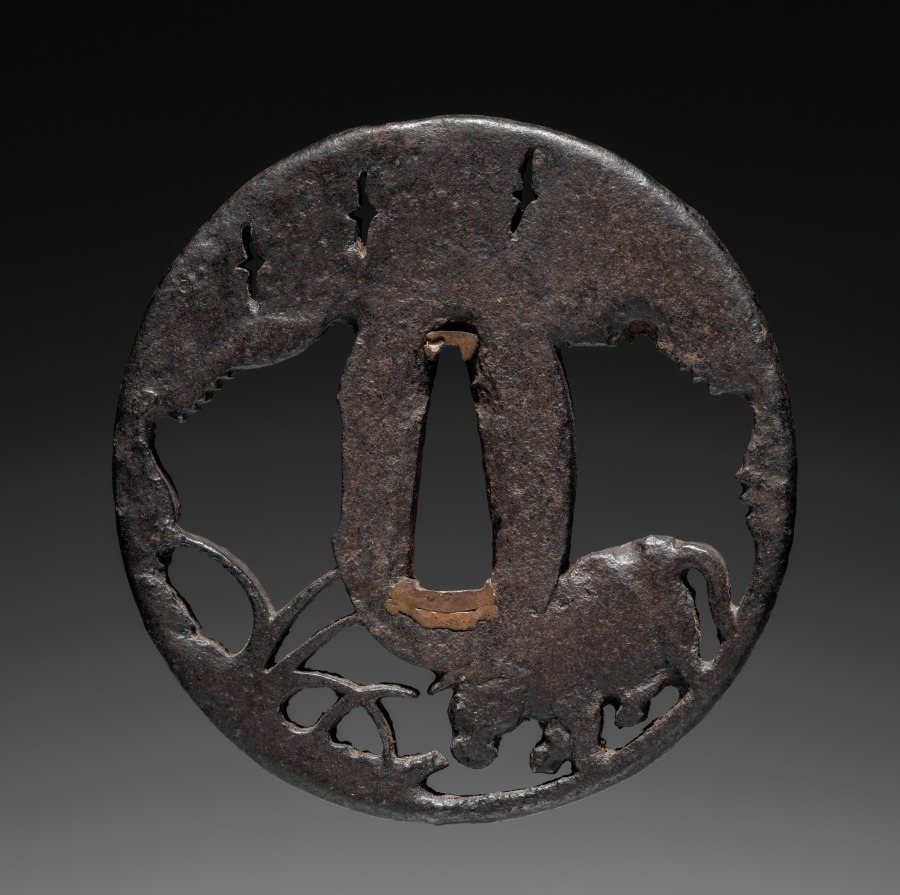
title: Sword Guard (Tsuba) with Ox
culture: Japan, possibly Edo period (1615-1868)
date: c. 1615–1868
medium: iron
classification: Arms and Armor